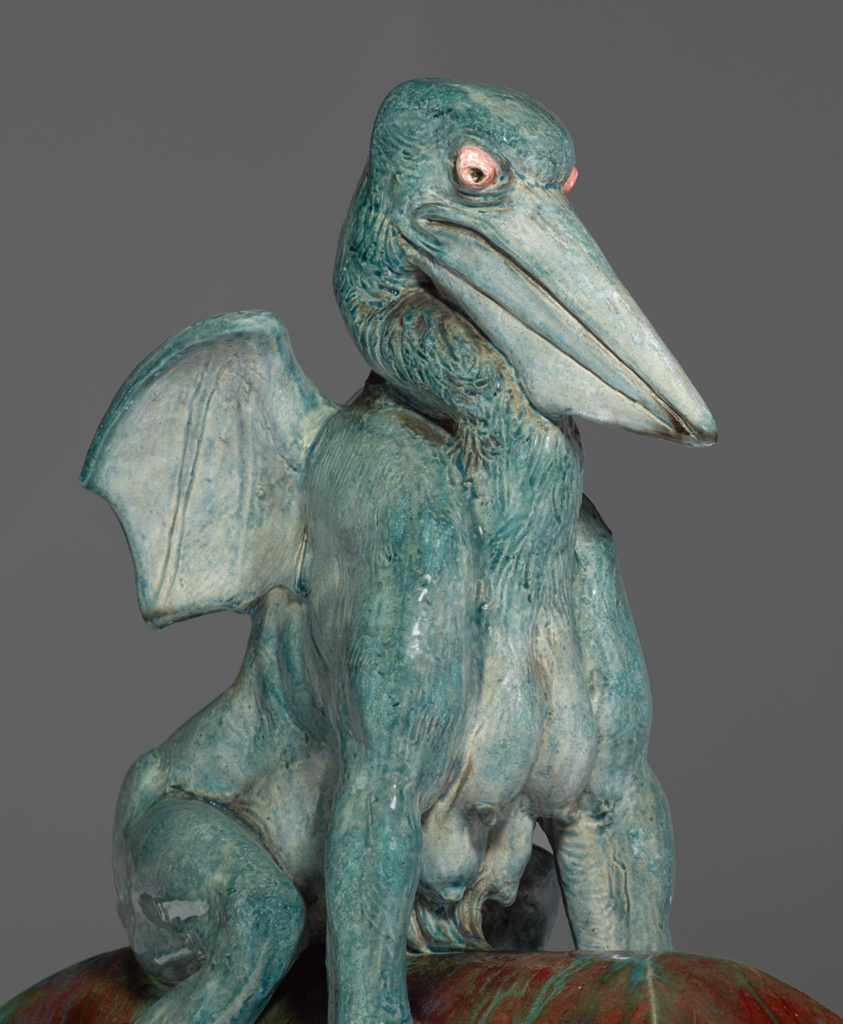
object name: Ceramics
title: Pelican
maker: Emmanuel Fremiet, French, 1824–1910; Made by Émile Muller et Cie, Ivry-sur-Seine, France, 1854–1908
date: c. 1896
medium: Glazed stoneware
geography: France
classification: sculpture; ceramics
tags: mythological figures, animals, bird, pelican, wings